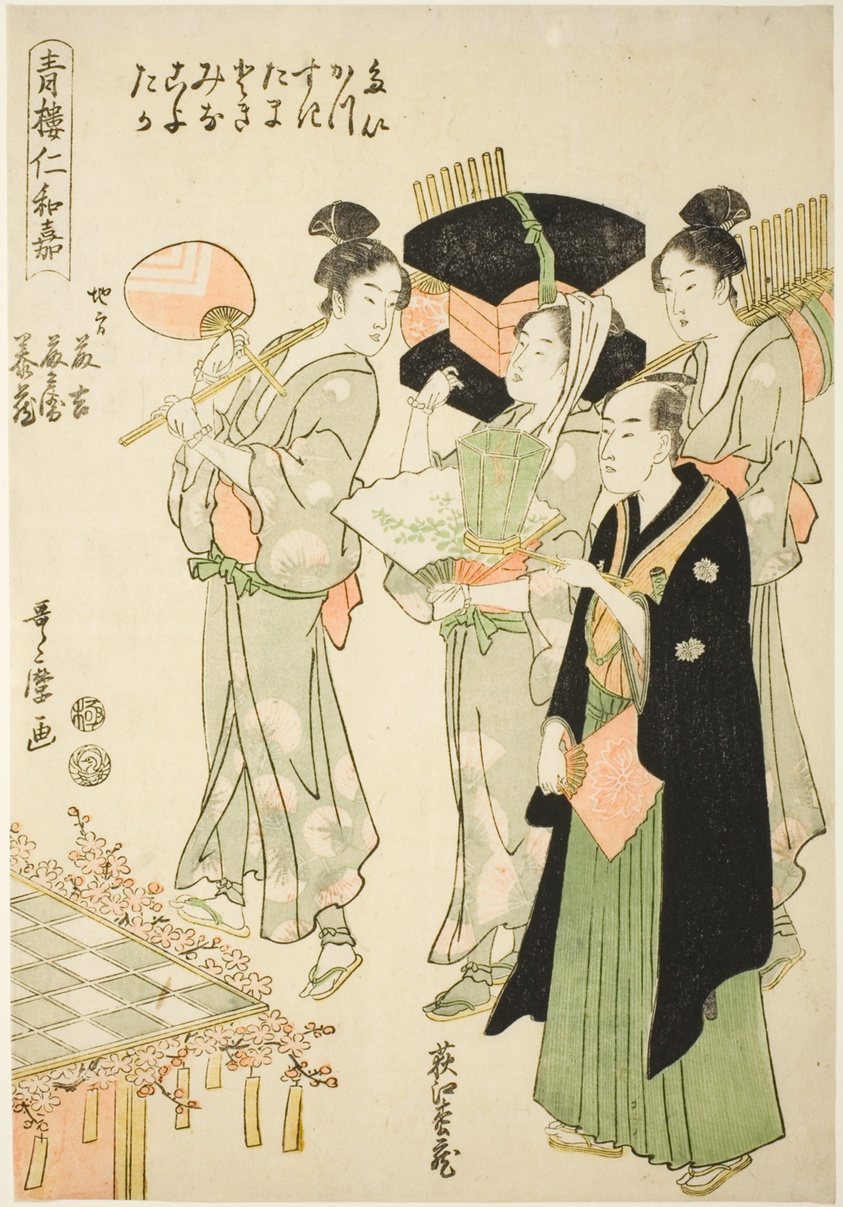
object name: Print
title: Seiro niwaka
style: Japanese (culture or style)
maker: Kitagawa Utamaro 喜多川 歌麿; Japanese, 1753 (?)-1806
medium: Color woodblock print; aiban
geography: Japan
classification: woodblock print; print; asian art